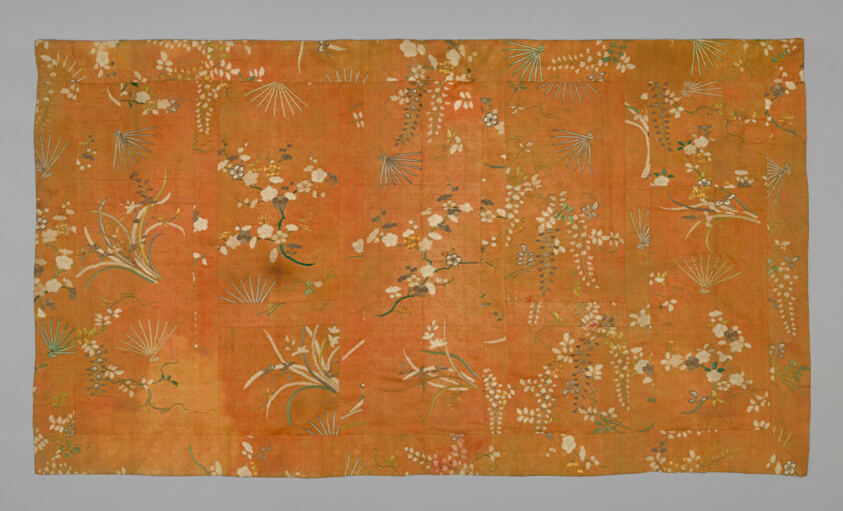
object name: Textile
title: Kesa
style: late edo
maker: Japan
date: late Edo period (1789–1868), 1789/1818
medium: Silk, satin damask weave (rinzu); resist dyed (shibori); embroidered with silk and gold-leaf-over-lacquered-paper strip in satin and stem stitches; laidwork and couching; lined with silk, plain weave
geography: Japan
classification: textile; liturgical - buddhist; needlework (visual works); weaving